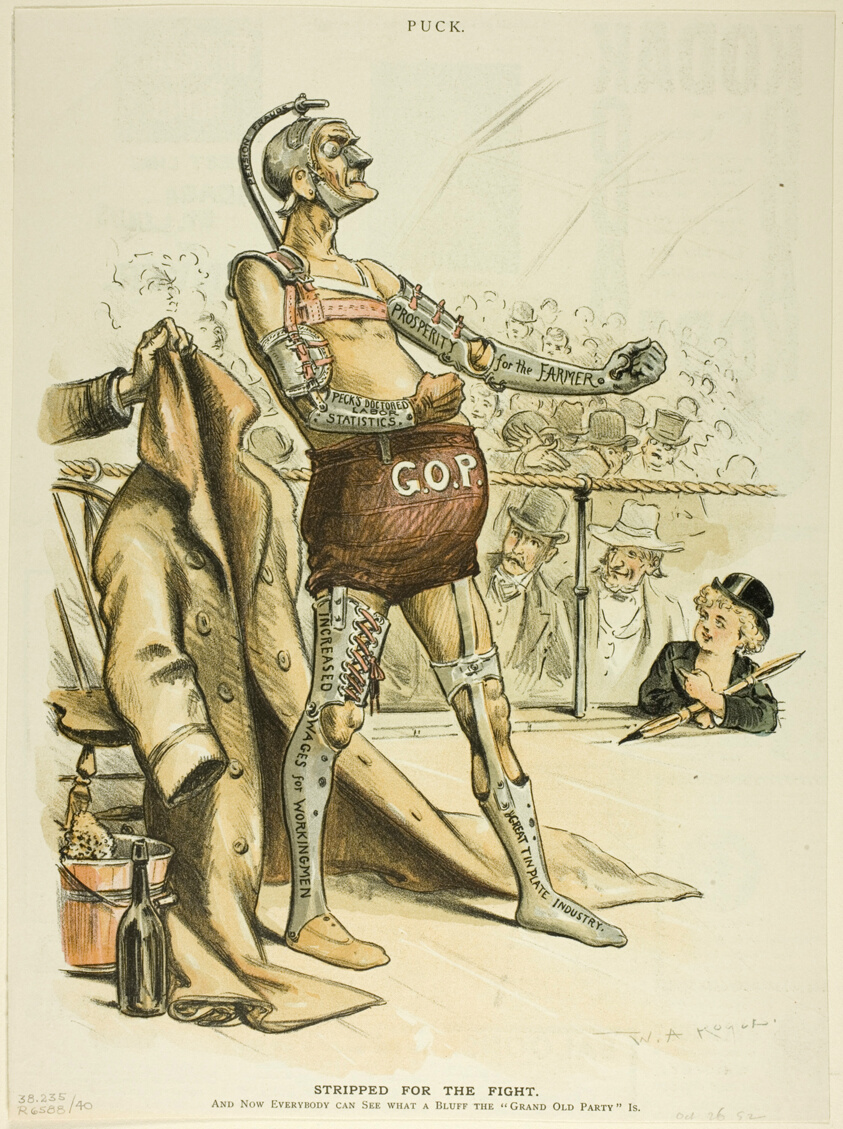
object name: Print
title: Stripped for the Fight, from Puck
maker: William Allen Rogers (American, 1854-1931)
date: 1892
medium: Color lithograph on newsprint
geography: United States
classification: lithograph; print; prints and drawing